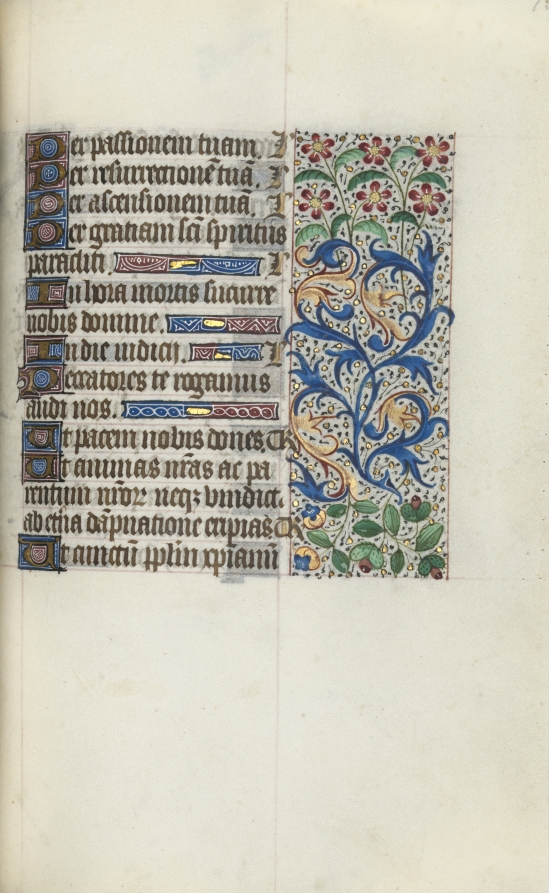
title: Book of Hours (Use of Rouen): fol. 95r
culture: France, Rouen, 15th century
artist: Master of the Geneva Latini (French, active Rouen, 1460–80)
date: c. 1470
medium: ink, tempera, and gold on vellum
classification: Bound Volume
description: In the late 1400s and early 1500s Rouen was an established and important center of book production. The city’s cathedral had a wealthy chapter that spent large sums of money to commission books and to maintain its extensive library. The stationers and booksellers would have likely been concentrated in or near the cathedral precinct. This artist, named after a manuscript now in Geneva, was Rouen’s principal illuminator during the second half of the 1400s.